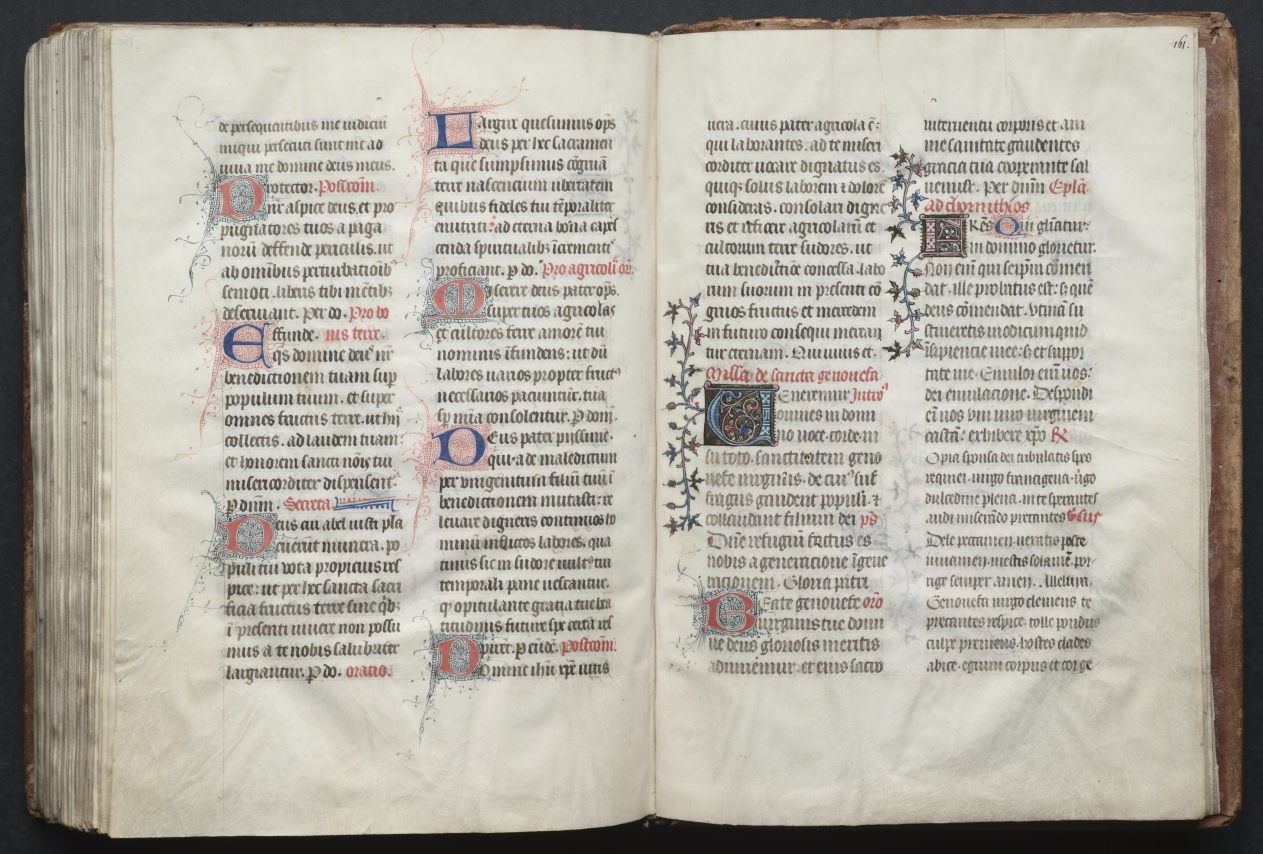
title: The Gotha Missal: Fol. 161r, Text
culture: France, Paris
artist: Master of the Boqueteaux (French)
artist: and Workshop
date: c. 1375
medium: ink, tempera, and gold on vellum; blind-tooled leather binding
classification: Bound Volume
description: The style and quality of this manuscript's decoration is typical of deluxe Parisian books made for aristocratic or royal patrons. Most of the book's decoration appears to be the work of the Master of the Boqueteaux, an artist active at the court of King Charles V (died 1380). His style was apparently shared by a number of book illuminators working in and around Paris. It is very possible that the Gotha Missal belonged to Charles V, but is not provable because the manuscript has no royal portraits and lacks a colophon. Given the book's magnificent decoration, however, it would seem that it was produced for a Valois prince, if not for the king himself. The manuscript receives its name from the German dukes of Gotha, its later owners.